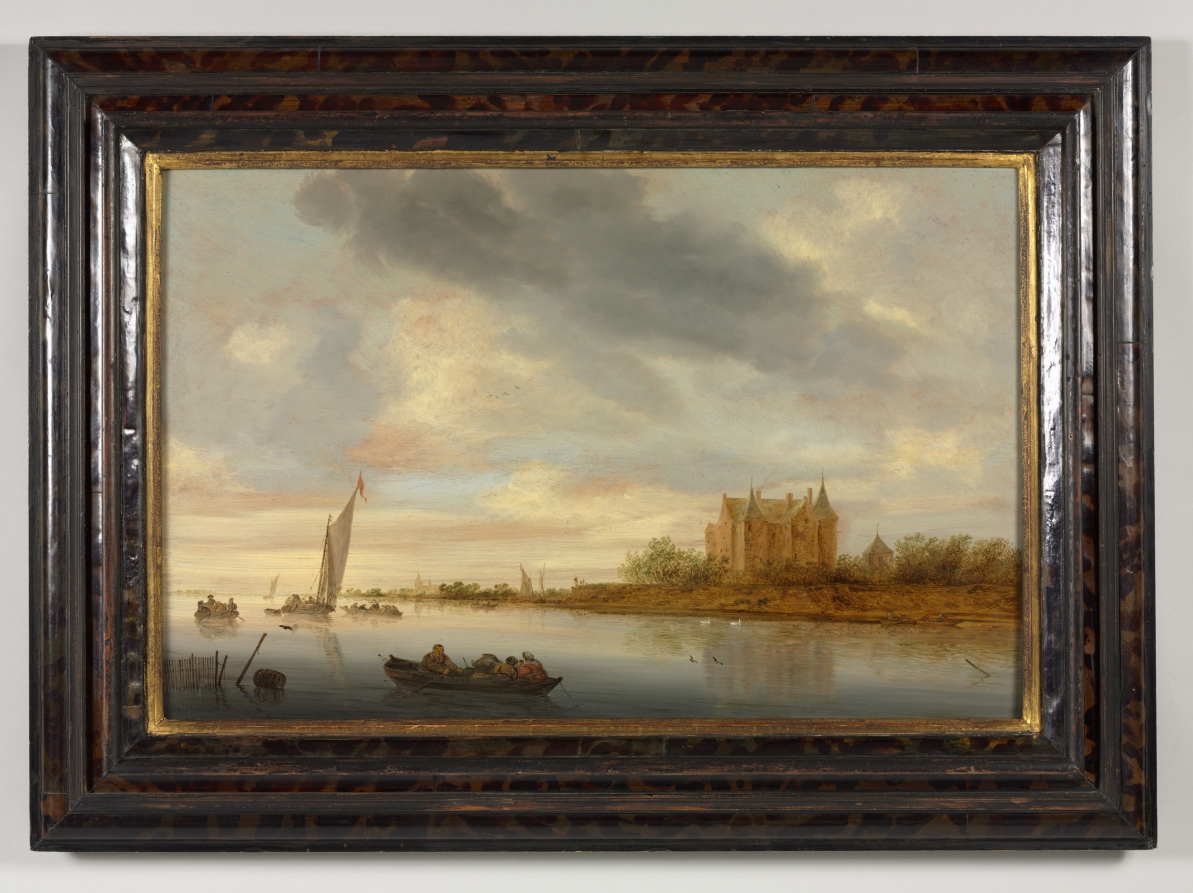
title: Castle on a River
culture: Netherlands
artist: Salomon van Ruysdael (Dutch, 1602–1670)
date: 1644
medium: oil on wood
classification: Painting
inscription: Signed lower left on boat: "S.VR / 1644 (VR in monogram]"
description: Salomon van Ruysdael, the uncle of Jacob van Ruisdael, here represents a free interpretation of the Castle Loevenstein. In addition to its picturesque qualities, the castle had great political and cultural importance as the official state prison and a key fort in the southern Netherlands. Painted just before the Dutch won independence from Spain in 1648, the painting likely expressed nationalist pride for its owner.